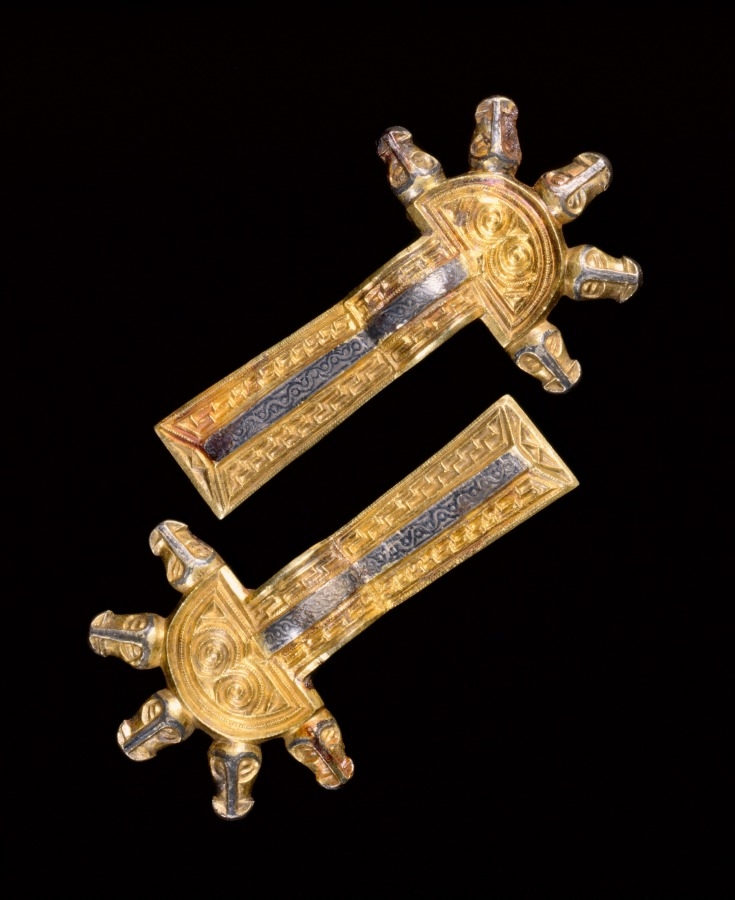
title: Pair of Fibulae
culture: Alemannic, Migration Period, 6th-7th century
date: 500s-600s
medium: cast silver, parcel-gilt, with niello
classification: Jewelry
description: A woman of high rank might have worn these twin fibulae on her shoulders, one fastening her inner garment on the right, the other her outer garment on the left. She might also have suspended them from her belt as decorative ornaments.